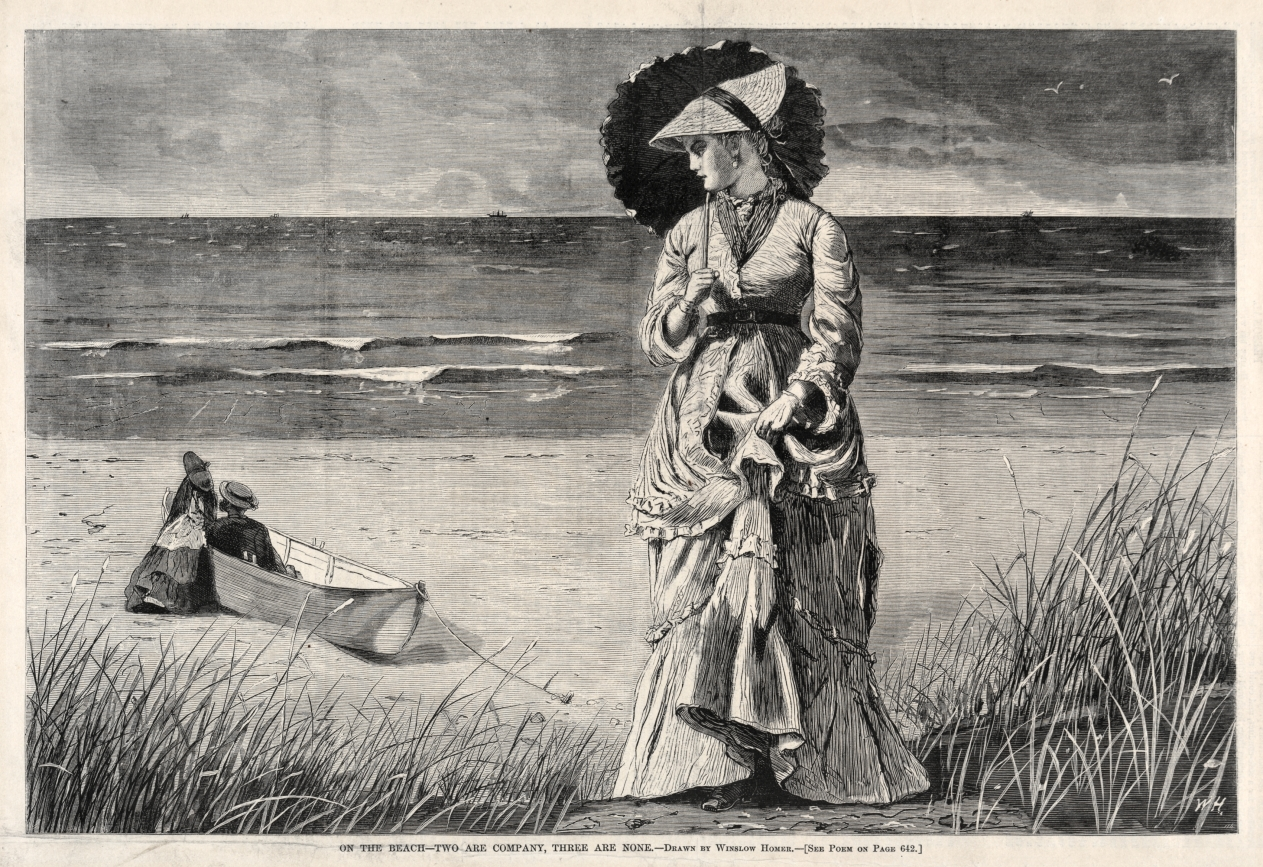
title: On the Beach - Two are Company, Three are None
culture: America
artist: Winslow Homer (American, 1836–1910)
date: 1872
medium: wood engraving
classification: Print